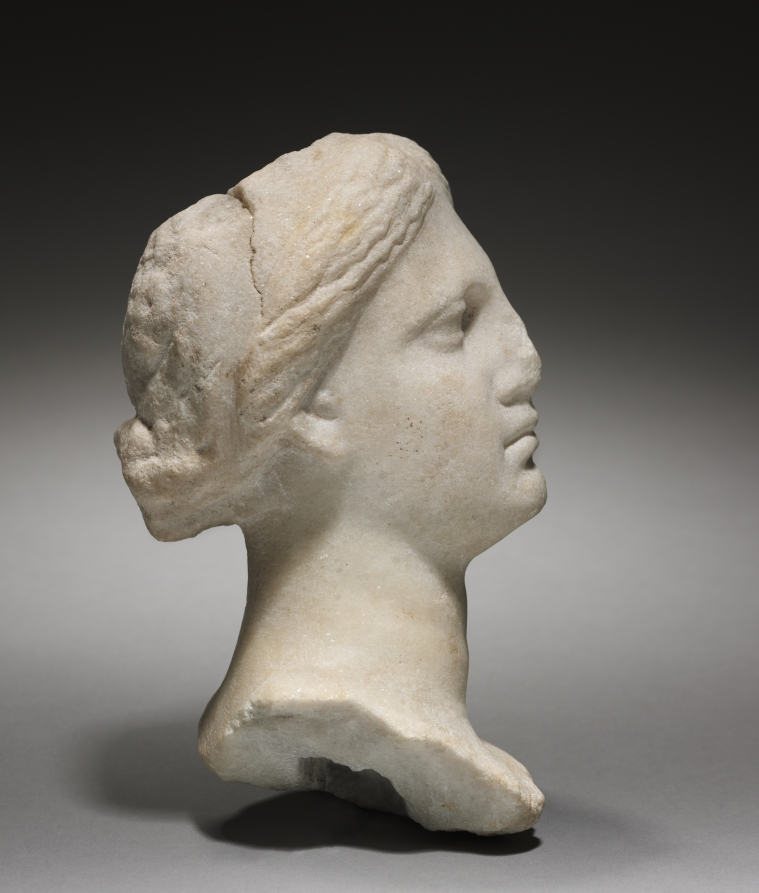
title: Head of a Woman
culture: Greece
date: 400–200 BCE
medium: marble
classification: Sculpture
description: This marble bust of a woman is rendered with the soft, delicate features typical of Greek sculpture of the late fourth and early third century BCE. Her features nearly disappear into the smooth landscape of her face, each curve fading softly into the next. Her hair is held away from her forehead in a series of tight braids pulled back to a bun, now mostly lost.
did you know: Though this hairstyle is often associated with sculptures of Aphrodite, it was also a popular style among mortal Greek women.